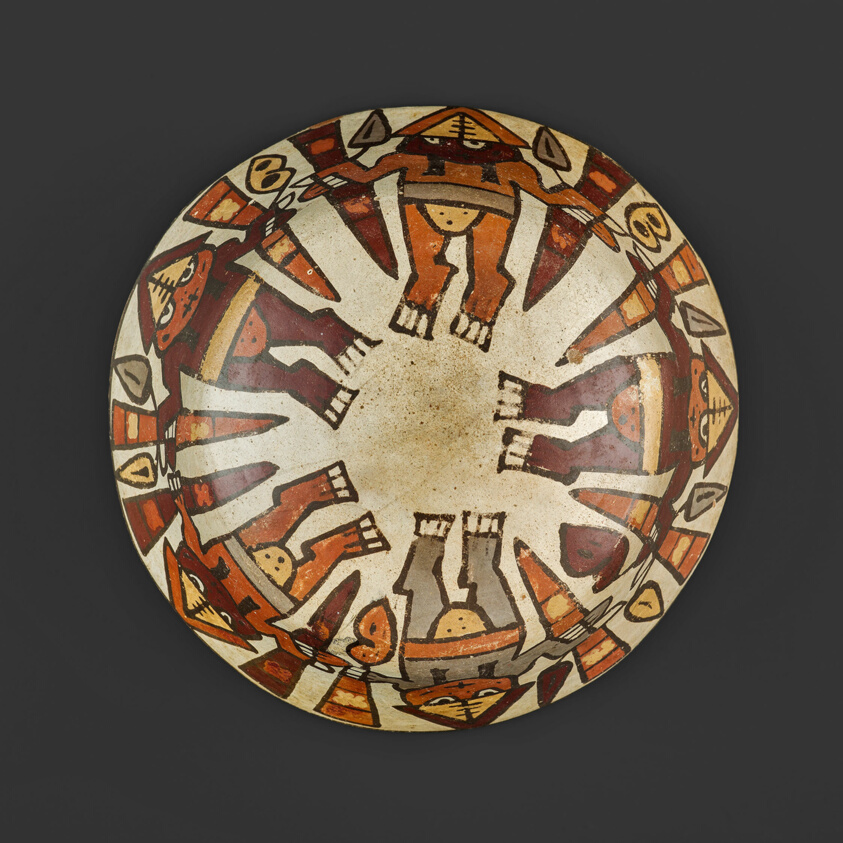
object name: Vessel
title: Bowl Depicting a Harvest Dance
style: nazca, early intermediate period, Pre-Columbian, americas, andes, Arts of the Americas, andean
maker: Nazca; South coast, Peru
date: 180 BCE–500 CE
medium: Ceramic and pigment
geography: Peru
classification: bowl; earthenware; art of the americas; ceramics; vessel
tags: people, landscapes, agriculture, ritual